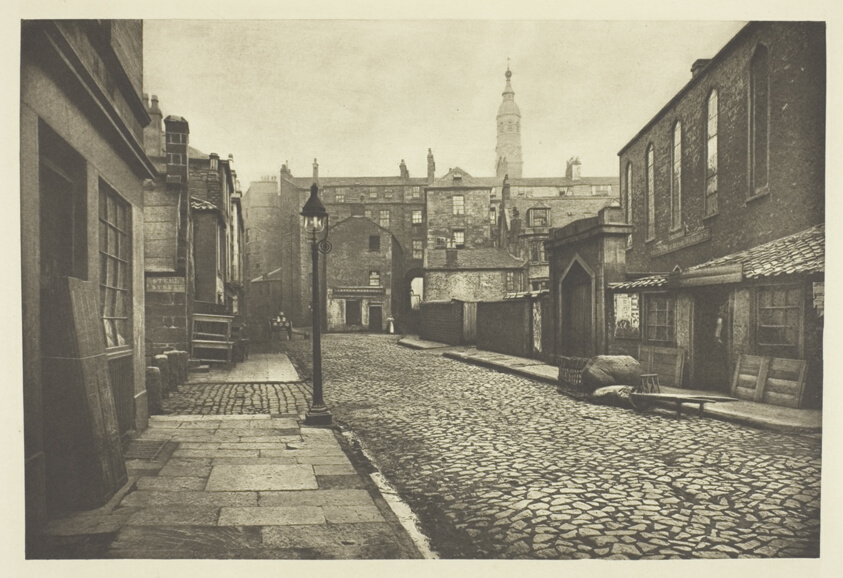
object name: Photograph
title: Low Green Street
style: 19th century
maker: Thomas Annan (Scottish, 1829–1887)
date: 1868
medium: Photogravure, plate 35 from the book "The Old Closes & Streets of Glasgow" (1900)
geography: Scotland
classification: photograph; photography